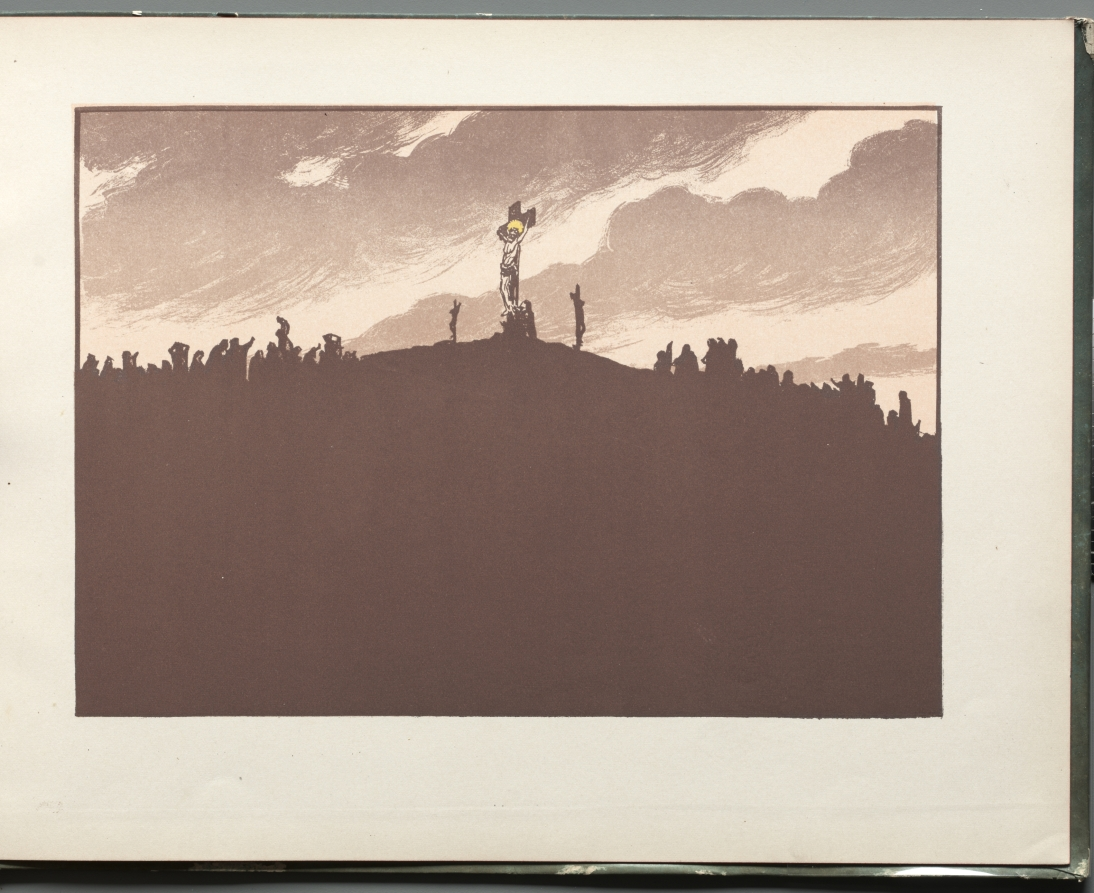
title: The Progress of the Stars: Le Golgotha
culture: France, 19th century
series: Bound Volume illustrating the poetry and music of Georges Fragerolle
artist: Henri Rivière (French, 1864–1951)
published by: C. Marpon & Flammarion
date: 1890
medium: 18 color lithographs in a Bound Volume illustrating the poetry and music of Georges Fragerolle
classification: Bound Volume